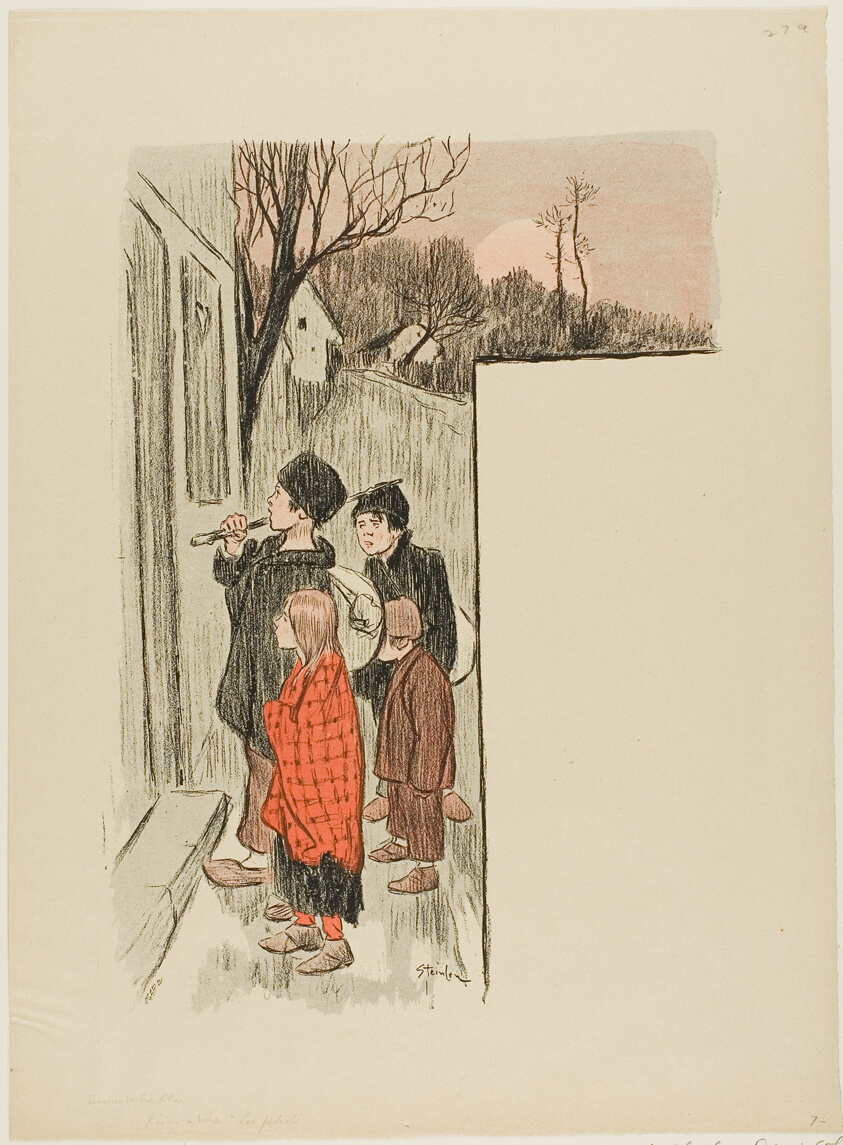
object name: Print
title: Les Petiots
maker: Théophile-Alexandre Steinlen; French, born Switzerland, 1859-1923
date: published October 27, 1893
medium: Photorelief print in red and black on cream wove paper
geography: France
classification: photorelief; print; prints and drawing